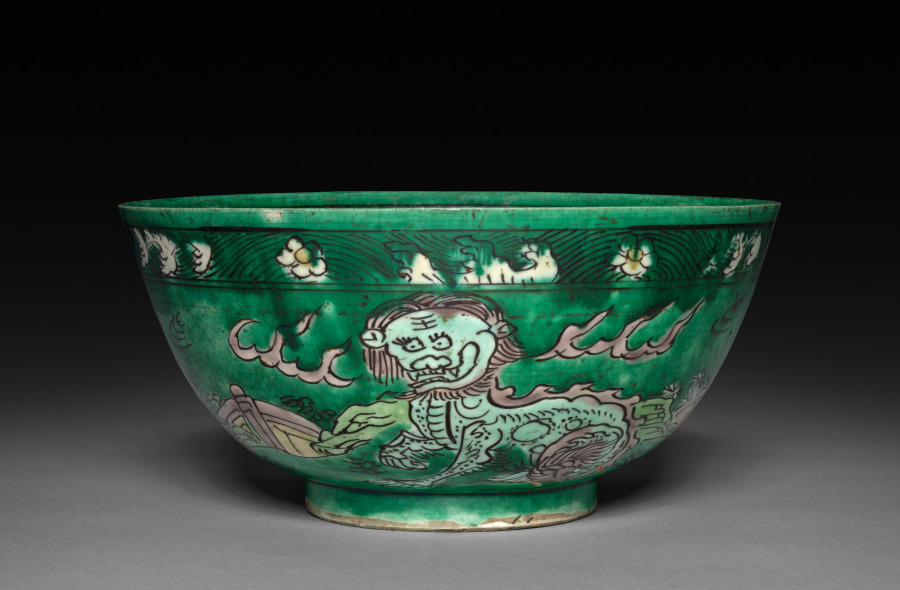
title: Bowl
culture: China, Ming dynasty (1368-1644), Xuande reign (1425-1435)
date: 1426–1435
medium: porcelain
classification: Ceramic